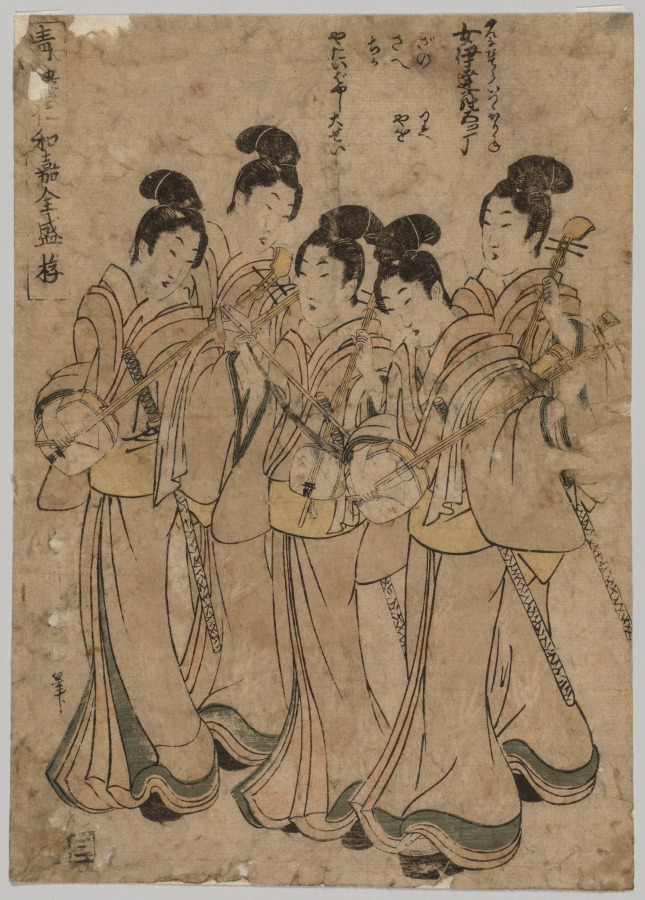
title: Young Women with Musical Instruments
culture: Japan, Edo period (1615–1868)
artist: Kikukawa Eizan (Japanese, 1787–1867)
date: 1787–1867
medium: color woodblock print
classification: Print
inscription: Signature: Kikugawa Yeizan fude